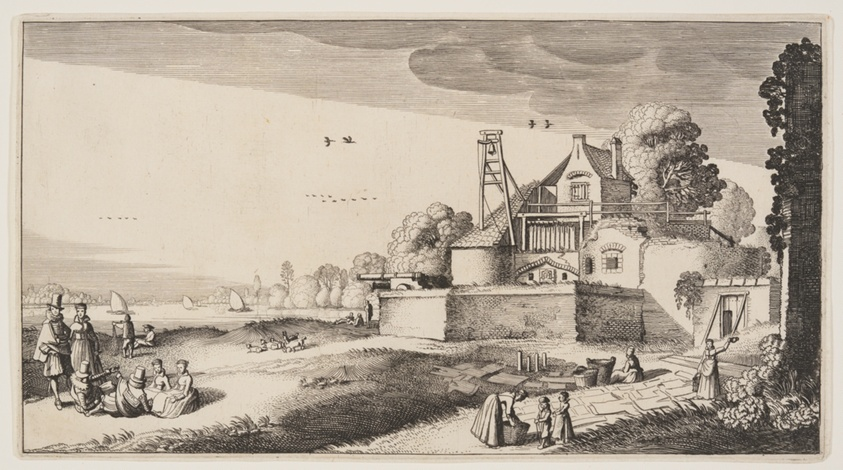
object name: Print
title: Bleaching-Field in Front of a Fort on a River, from Landscapes (Playsante Lantschappen)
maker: Attributed to Claes Jansz. Visscher II (Dutch, 1586-1652); after Jan van de Velde II (Dutch, c. 1593-1641)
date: c. 1641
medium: Etching, with engraving, on ivory laid paper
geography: Netherlands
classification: etching; paper; print; prints and drawing